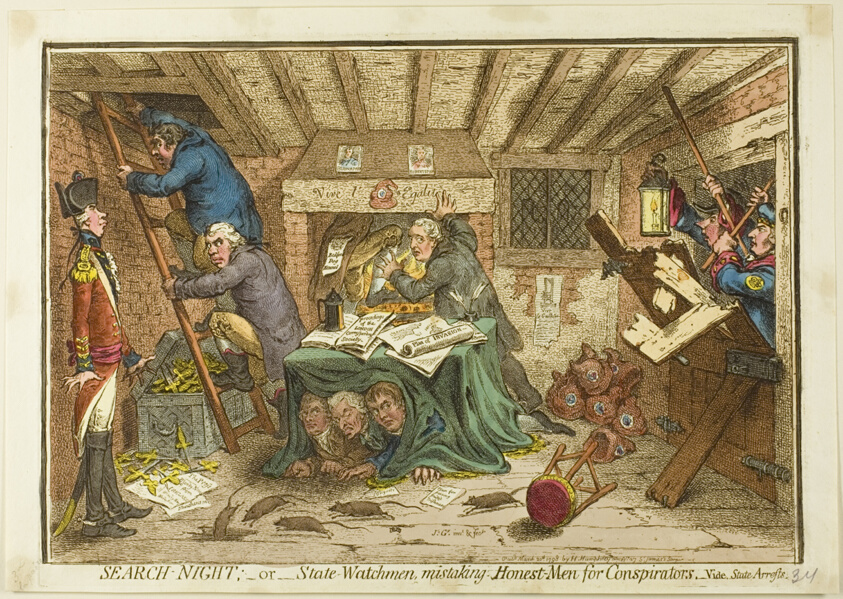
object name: Print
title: Search-Night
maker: James Gillray (English, 1756-1815); published by Hannah Humphrey (English, c. 1745-1818)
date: published March 20, 1798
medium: Hand-colored etching on paper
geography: England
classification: etching; print; prints and drawing